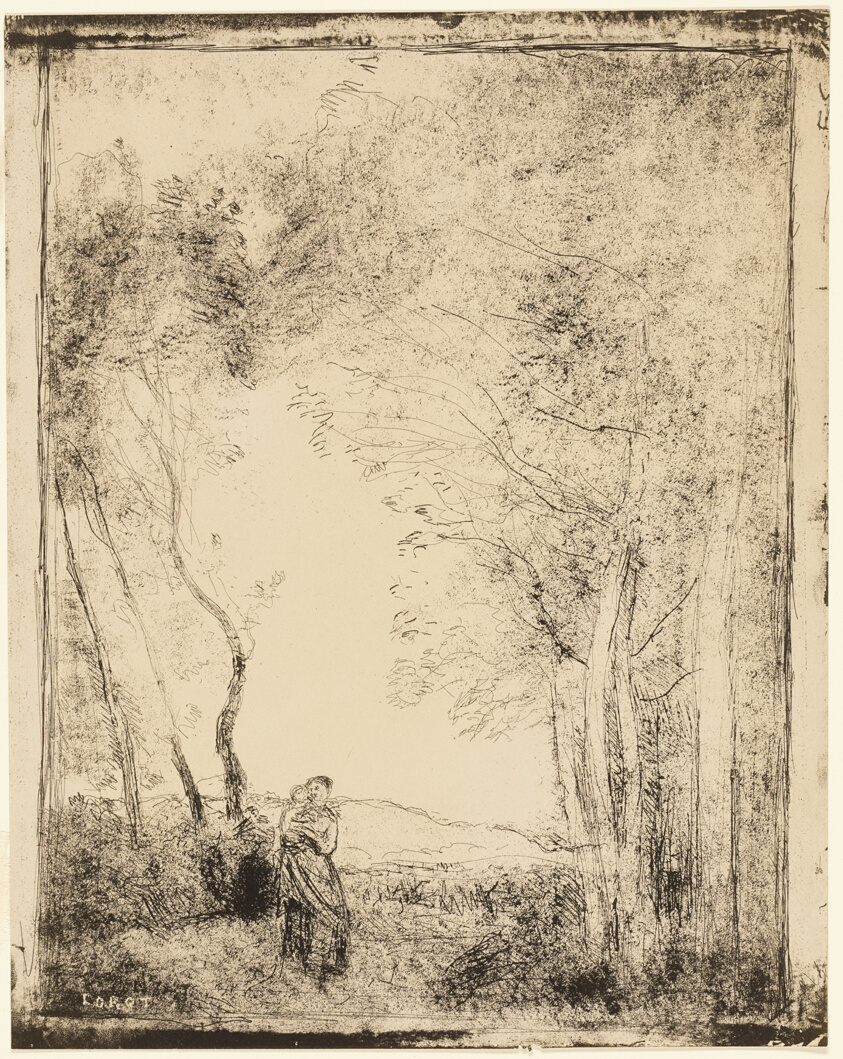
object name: Print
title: Young Mother at the Edge of the Woods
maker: Jean-Baptiste-Camille Corot; French, 1796-1875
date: 1856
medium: Cliché-verre on ivory photographic paper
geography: France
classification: cliché-verre; print; prints and drawing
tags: mothers, children